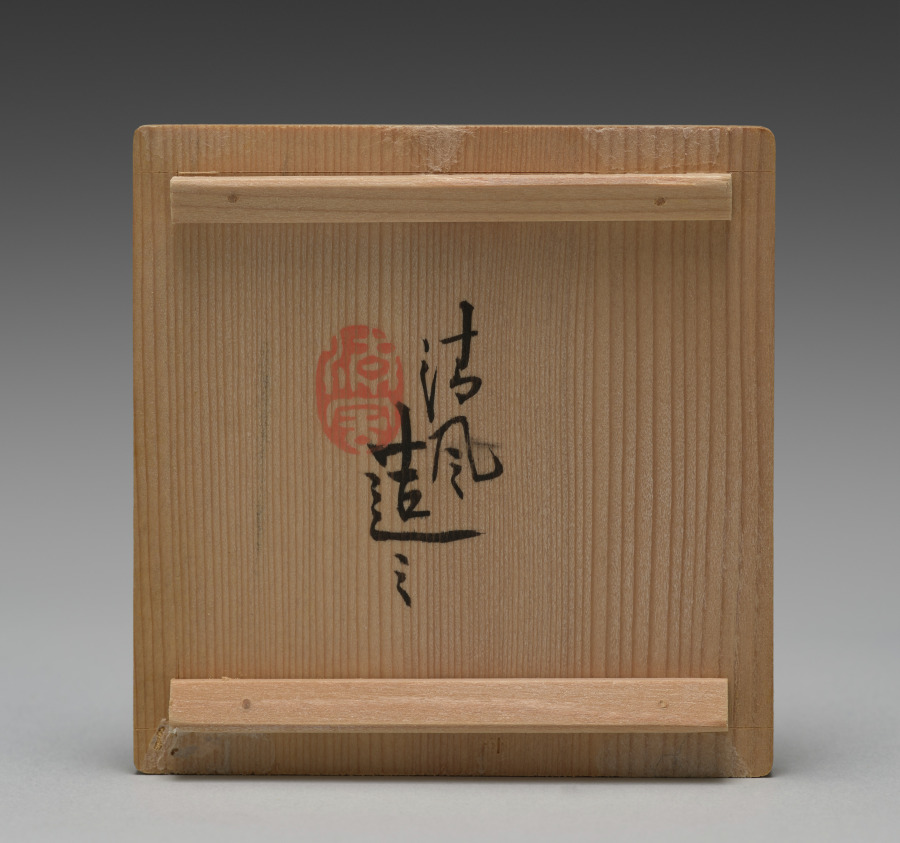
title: Sake Cup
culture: Japan, Meiji period (1868–1912)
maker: Seifū Yohei III (Japanese, 1851–1914)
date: c. 1893–1914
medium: porcelain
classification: Ceramic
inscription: 清風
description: Seifū Yohei III was the first ceramist to be designated an Imperial Household Artist, a position that came with an annuity. He was tasked with producing items need by the imperial household to decorate the Meiji Palace and to present to state guests as gifts.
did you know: There are subtle bamboo leaflike shapes on the interior of the sake cup.